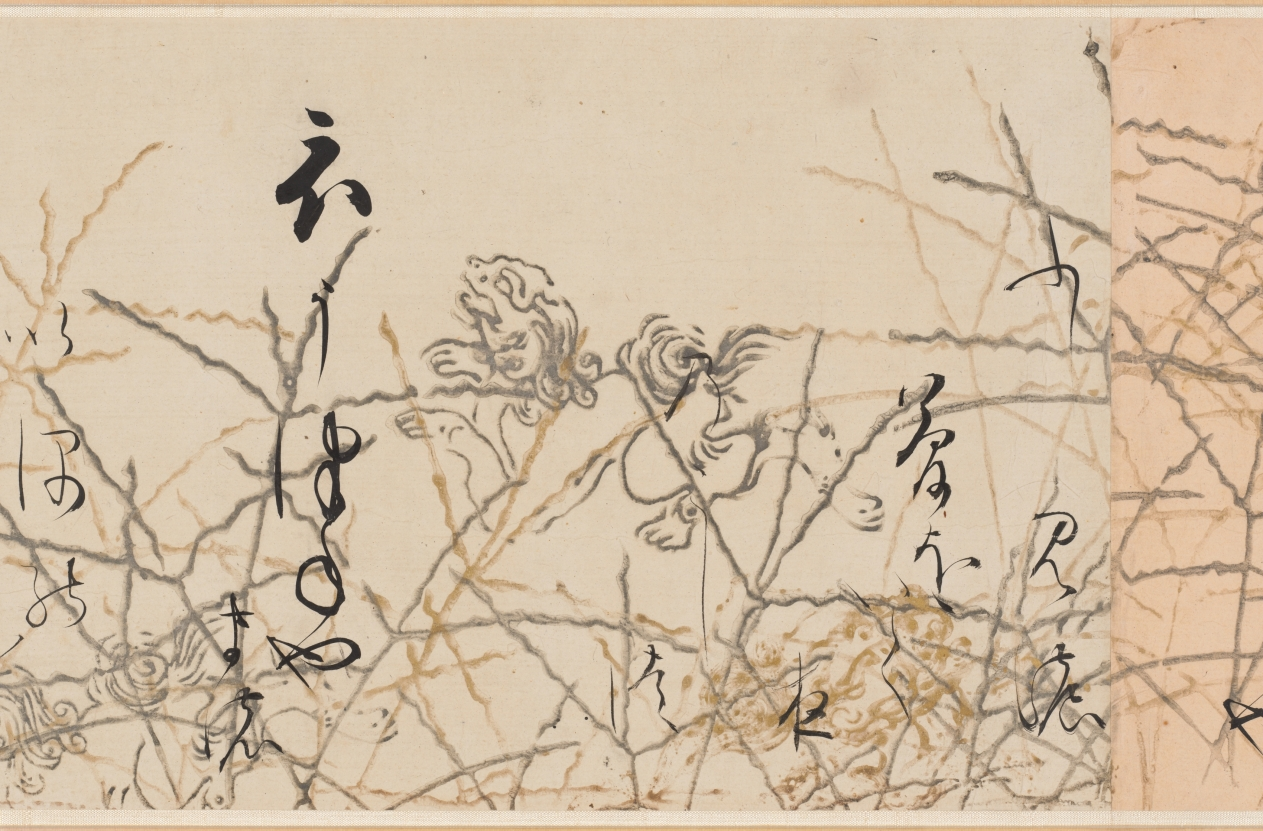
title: Selections from the New Collection of Japanese Poems from Ancient and Modern Times (Shinkokin wakashū) with Printed Designs of Chinese Lions and Crab Finger Grass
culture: Japan, Edo period (1615–1868)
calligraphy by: Hon'ami Kōetsu (Japanese, 1558–1637)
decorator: Tawaraya Sōtatsu (Japanese, c. 1570–c. 1640)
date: early 1600s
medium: handscroll; ink, gold, and silver on paper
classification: Calligraphy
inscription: Seal: 光悦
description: Hon’ami Kōetsu was a calligrapher and craftsman who frequently collaborated with the painter Tawaraya Sōtatsu, considered the first master of the Rinpa school. Kōetsu brushed seven poems from the autumn section of a poetry anthology onto dyed paper with motifs designed and printed in gold and silver by Sōtatsu.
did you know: Before becoming a master painter of screens, Tawaraya Sōtatsu painted fans.